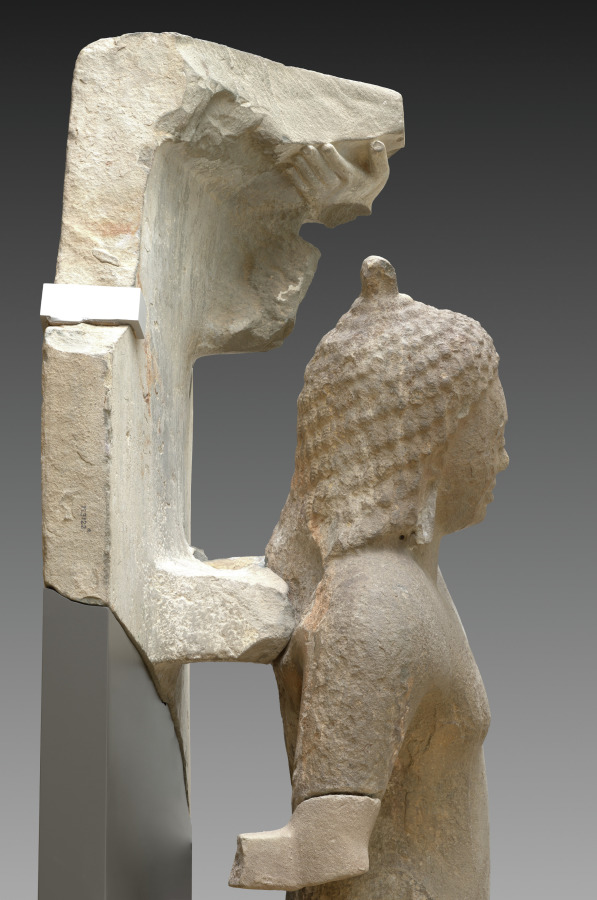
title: Krishna Lifting Mount Govardhan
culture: Southern Cambodia, Takeo Province, Phnom Da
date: c. 600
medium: Sandstone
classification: Sculpture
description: This masterwork of early Cambodian sculpture shows the Hindu god Krishna effortlessly holding aloft a mountain to protect his fellow villagers and herds from torrential storms sent by a jealous old god. It is one of eight monumental monolithic figures recovered from a two-peaked mountain in the floodplains of the Mekong River delta, on the outskirts of the ancient urban center of Angkor Borei.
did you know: Gold earrings were once fastened to the sculpture using holes in the figure's earlobes.